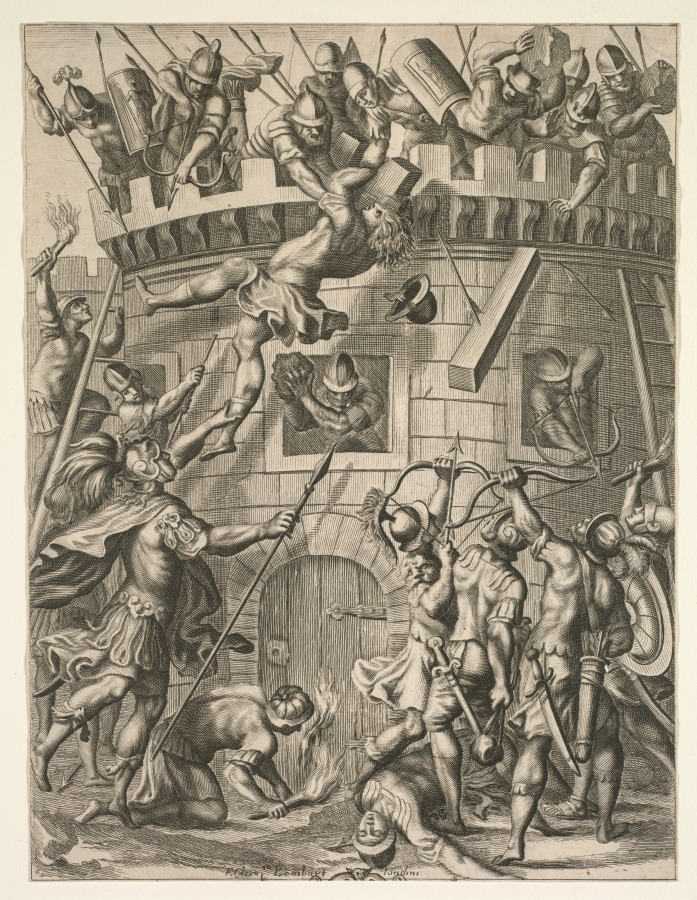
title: Aeneid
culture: France, 17th century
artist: Pierre Lombart (French, 1612–1682)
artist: after Francis Cleyn (German, 1582–1658)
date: 1658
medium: engraving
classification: Print